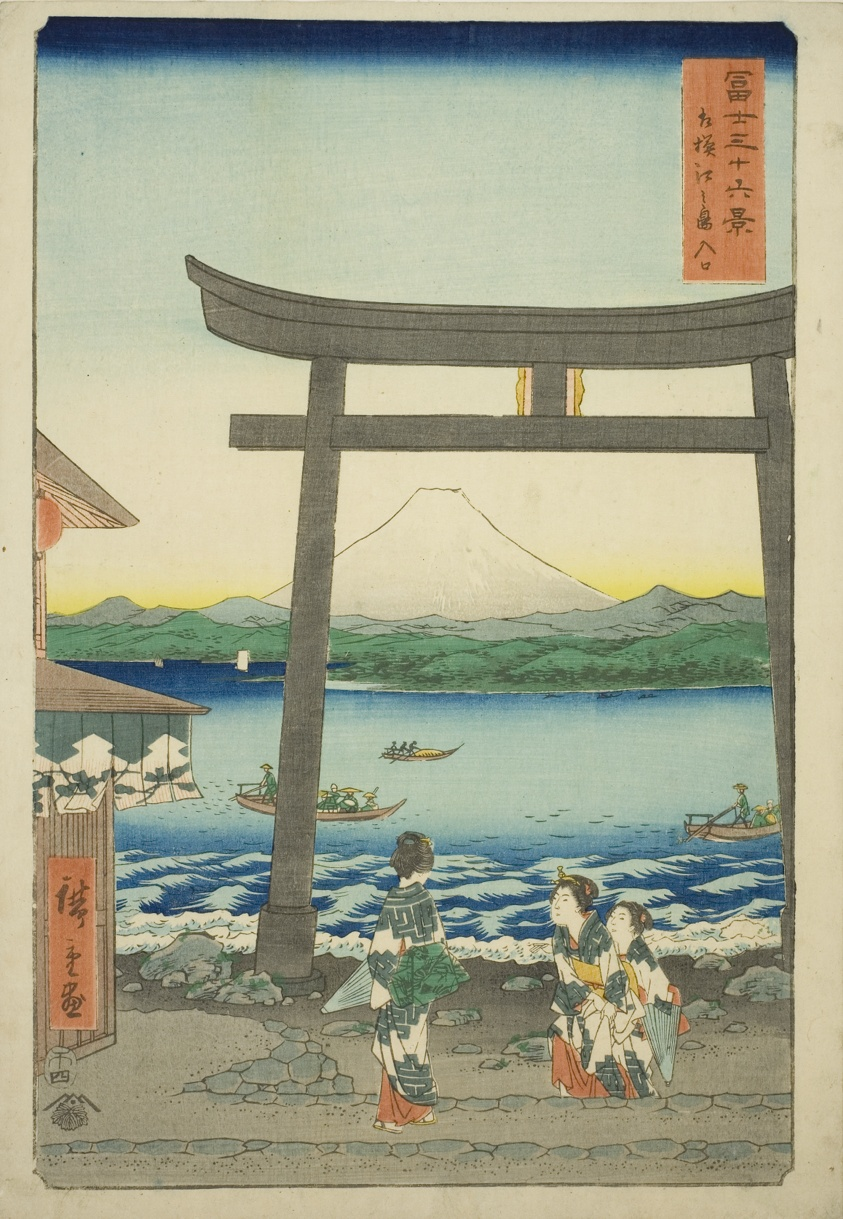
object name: Print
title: Entrance To Enoshima in Sagami Province (Sagami Enoshima iriguchi), from the series "Thirty-six Views of Mount Fuji (Fuji sanjurokkei)"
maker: Utagawa Hiroshige 歌川 広重; Japanese, 1797-1858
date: 1858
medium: Color woodblock print; oban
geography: Japan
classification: woodblock print; print; asian art